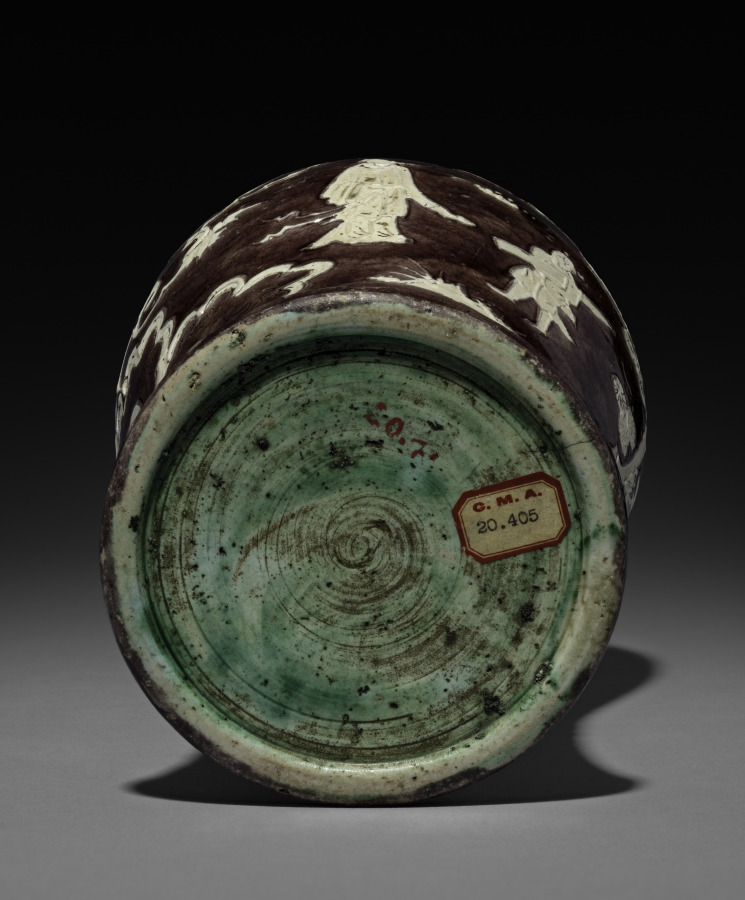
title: Vase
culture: China, Jiangxi Province, Ming dynasty (1368–1644)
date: late 1400s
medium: porcelain, Fahua ware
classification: Ceramic